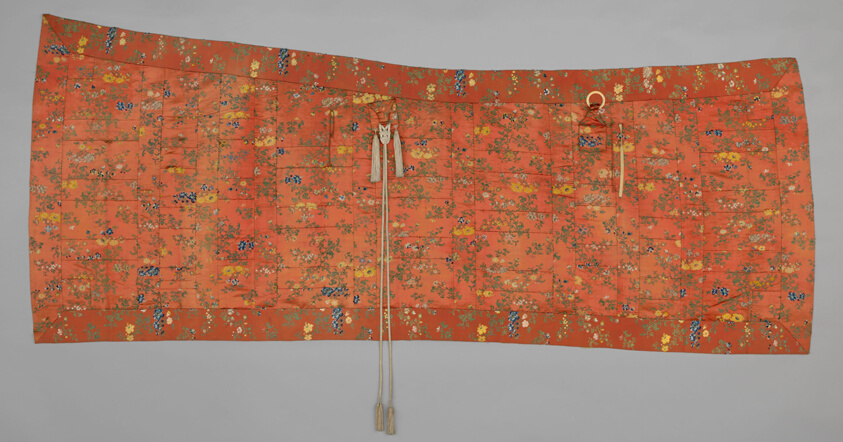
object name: Religious/Ritual Object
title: Kesa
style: edo (japanese period)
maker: Japan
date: Early 19th century, Late Edo period (1789–1868)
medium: Silk; satin weave with supplementary patterning wefts; silk cords and tassels; ivory ring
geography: Japan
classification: textile; costume; weaving; liturgical - buddhist; ritual objects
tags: flowers